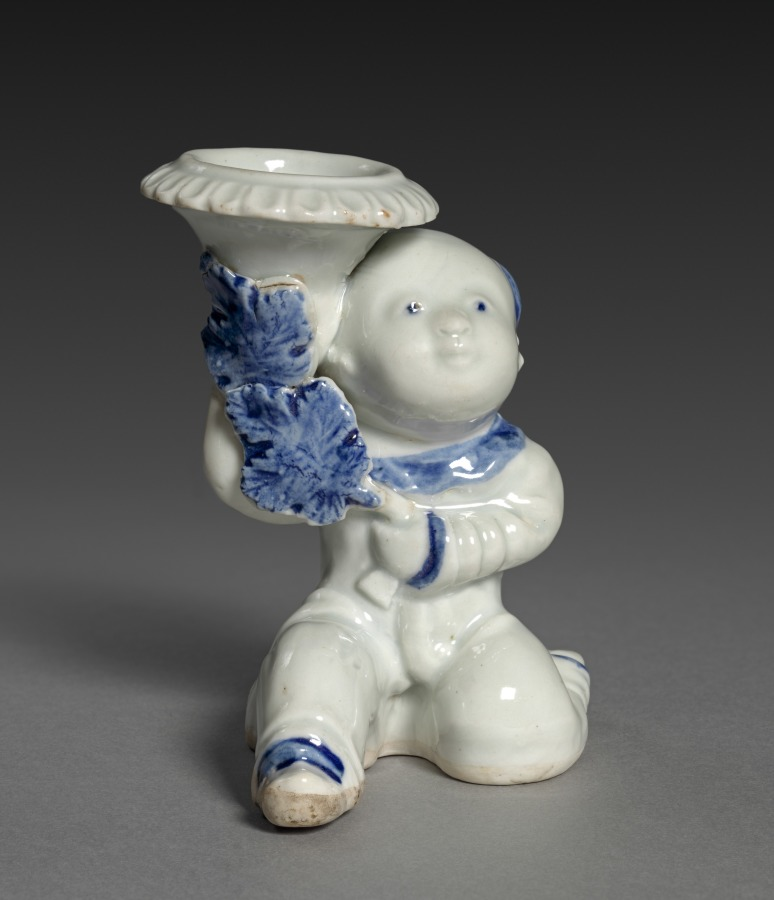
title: Kneeling Boy Holding a Vase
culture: Japan, Edo period (1615–1868)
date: 1700s-1800s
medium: porcelain, molded and carved, with underglaze blue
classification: Ceramic